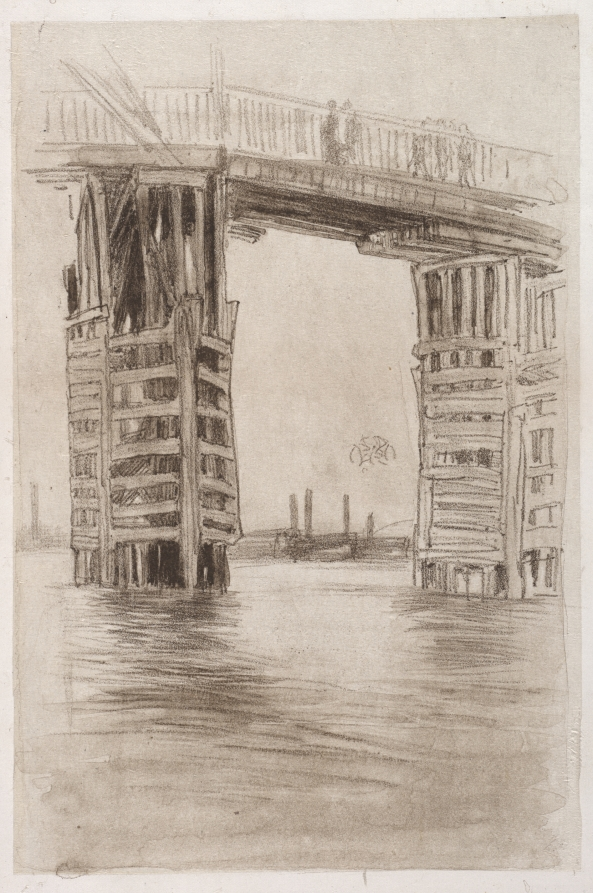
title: The Tall Bridge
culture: America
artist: James McNeill Whistler (American, 1834–1903)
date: 1878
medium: lithograph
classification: Print